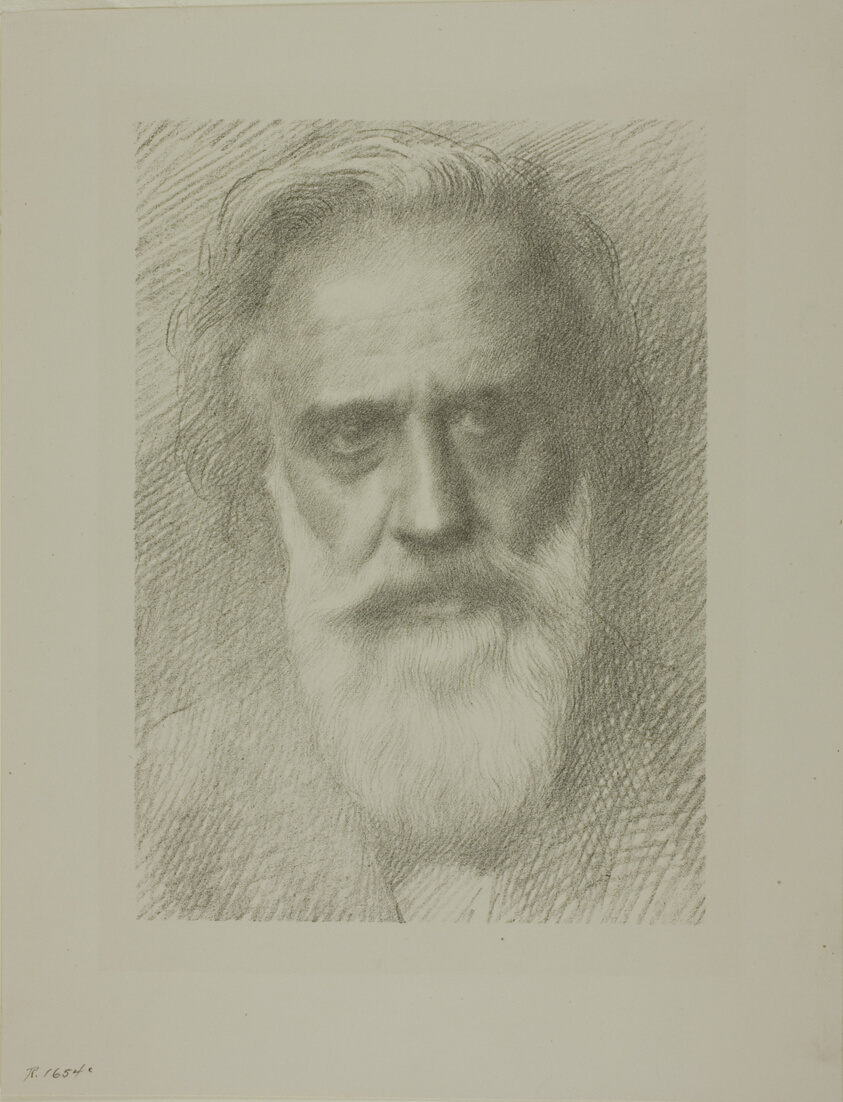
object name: Print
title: Portrait of the Artist, eighth plate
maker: Alphonse Legros (French, 1837-1911)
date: c. 1900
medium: Lithograph in black on cream wove paper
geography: France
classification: lithograph; print; prints and drawing